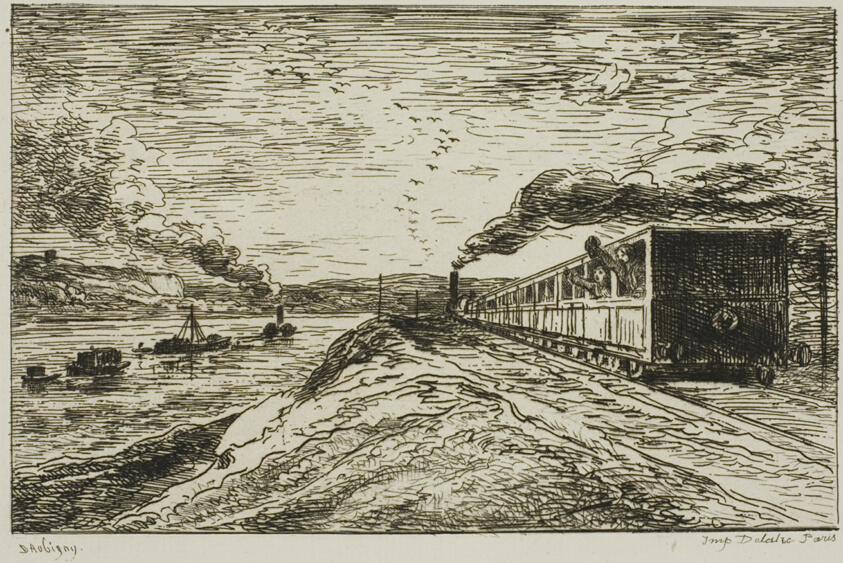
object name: Print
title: The Departure (The Return)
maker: Charles François Daubigny (French, 1817-1878)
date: 1861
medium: Etching on ivory laid paper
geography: France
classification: etching; print; prints and drawing